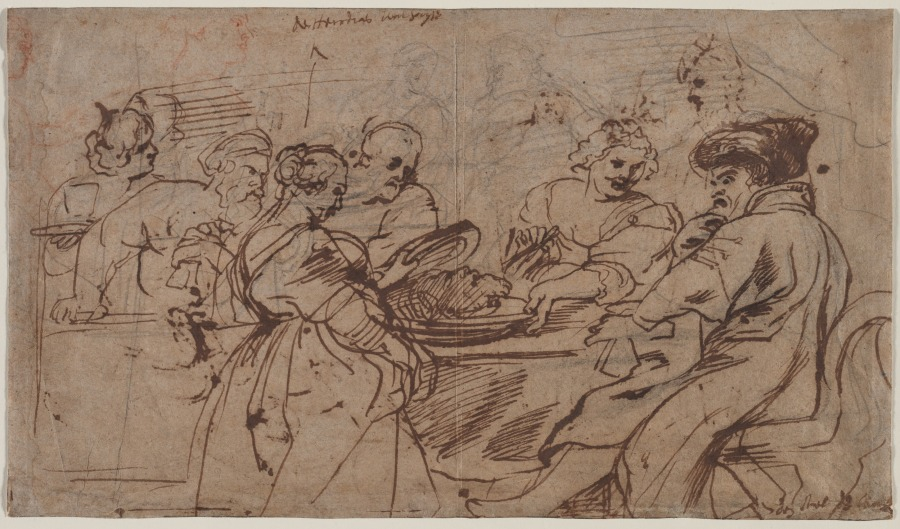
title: The Feast of Herod (recto); Tomyris with the Head of Cyrus (verso)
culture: Flanders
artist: Peter Paul Rubens (Flemish, 1577–1640)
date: c. 1637–38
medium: pen and brown ink, with black and red chalk, touched with white gouache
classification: Drawing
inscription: by artist, upper center, in brown ink: de Herodias [wat hooger? (or: "meden hoofte," "wat hoegte," or "wat hogher")]; by artist, lower right, in brown ink: den[or: deze] stoel te [cort?].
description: Peter Paul Rubens had a large studio in Antwerp and used drawing to prepare for large paintings as well as to direct the many pupils who assisted him. Striking in its immediacy, the drawing on the recto of this sheet of paper is a preparatory study for the Feast of Herod painting now at the Scottish National Gallery in Edinburgh. Herod, wearing a large cap and wrapped in a mantle, shrinks back in horror as Salome uncovers a charger that holds the head of Saint John the Baptist. Smiling, Herodias grabs the platter with her left hand and, in a chilling detail, gestures toward the charger with a fork. Rubens wrote what is usually interpreted as “Herodias somewhat higher” at the top of the sheet. The verso of the sheet depicts a sketch for another story featuring a change of fortune at the hands of a vengeful woman, Tomyris with the Head of Cyrus. Rubens made two paintings of the subject (now in Paris and Boston). A rare theme, the story tells of Queen Tomyris who, avenging the death of her son in battle, collects the head of his murderer Cyrus in a bag of human blood. Tomyris is shown seated under a canopy holding a scepter, while the servants before her handle Cyrus’s head. Rubens wrote “plus spatij” (more space) in the center of the sheet.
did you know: The two stories that Rubens depicted on the front and back of this sheet of paper each feature a gruesome death, the result of revenge at the hands of a powerful woman.